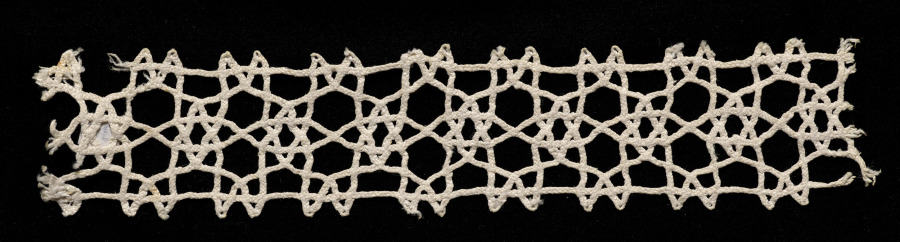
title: Lace Insertion (no selvage)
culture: Italy, Venice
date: 1540–60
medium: Bobbin lace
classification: Lace